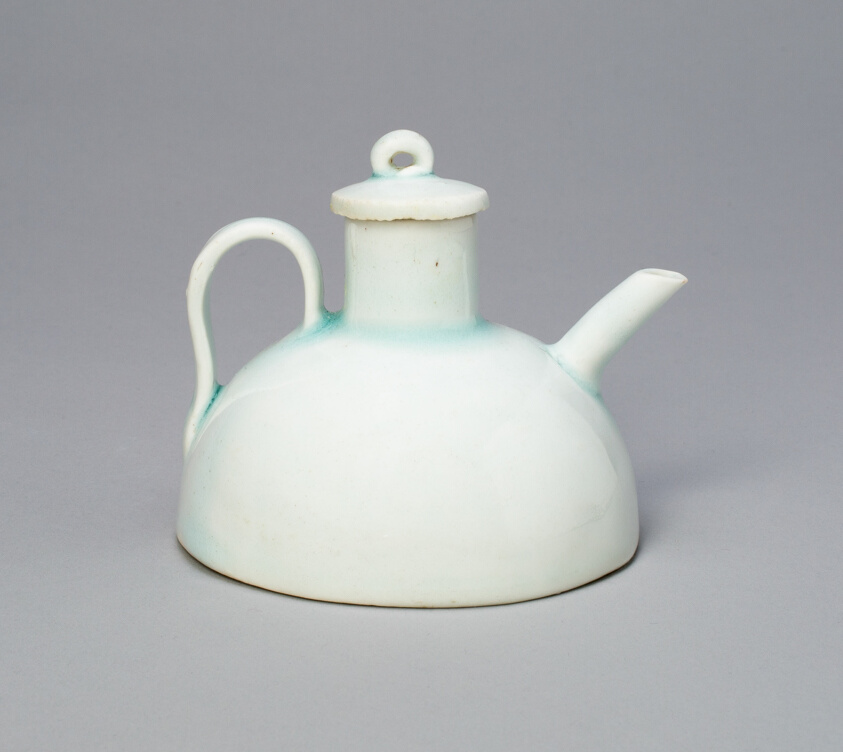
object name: Vessel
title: Saucepot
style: Chinese (culture or style)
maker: China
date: Southern Song (1127–1279) or Yuan dynasty (1279–1368), 13th/14th century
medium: Qingbai ware; glazed porcelain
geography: China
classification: vessel